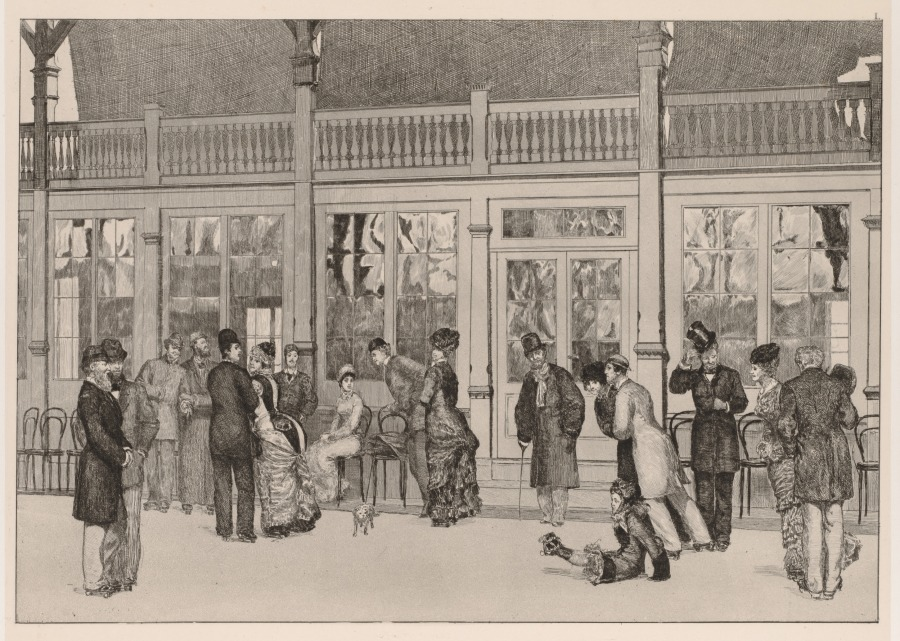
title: A Glove: The Locale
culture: Germany, 19th century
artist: Max Klinger (German, 1857–1920)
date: 1880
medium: etching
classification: Print